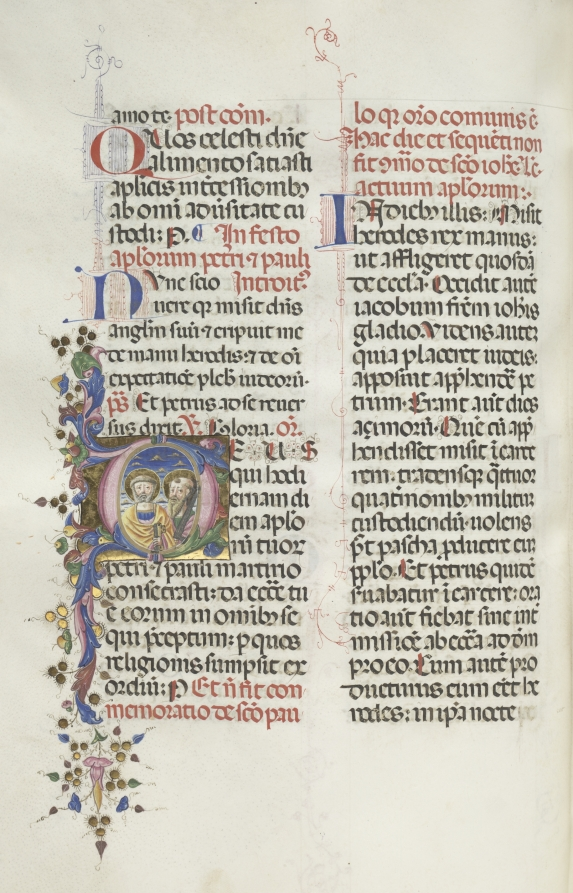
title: Missale: Fol. 290v: Saints Peter and Paul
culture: Italy, Perugia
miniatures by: Bartolommeo Caporali (Italian, c. 1420–1503)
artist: assisted by Giapeco Caporali (Italian, d. 1478)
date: 1469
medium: ink, tempera and burnished gold on vellum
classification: Bound Volume